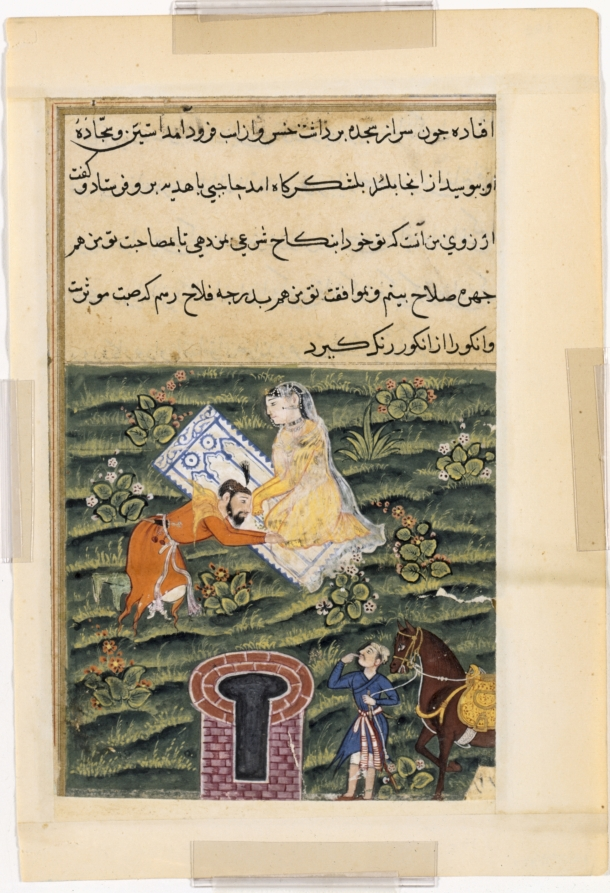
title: Khusrau, the King of Kings, pays homage to the pious daughter of Khassa, from a Tuti-nama (Tales of a Parrot): Fifty-first Night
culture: Mughal India, court of Akbar (reigned 1556–1605)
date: c. 1560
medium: gum tempera, ink, and gold on paper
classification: Painting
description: After being abandoned in the desert by her cruel husband, Khassa’s daughter is discovered by Khusrau, who is instantly captivated by her religious devotion. He proposes marriage and aptly punishes those who were cruel to her. The brick well that sustained her for many days in the desert is depicted in the foreground.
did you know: The woman kneels on a rug and holds prayer beads, signaling her Islamic faith.